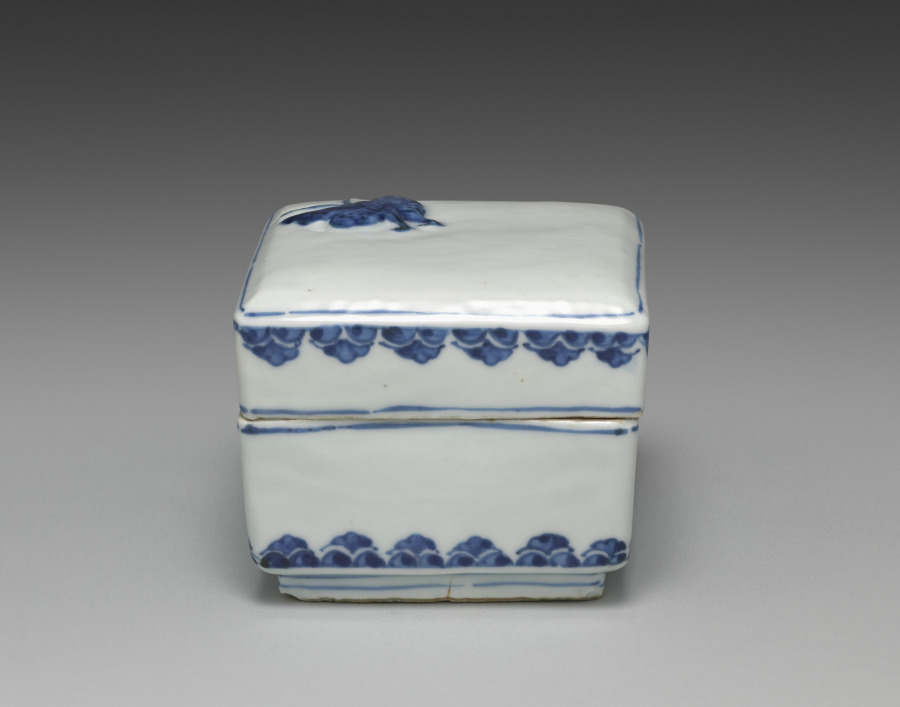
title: Box with Butterfly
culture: Japan, Meiji period (1868–1912)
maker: Seifū Yohei I (Japanese, 1801–1861)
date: 1855–57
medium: Porcelain with underglaze blue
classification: Ceramic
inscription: 清風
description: This sturdy box, with comparatively thick walls and resulting heft, is sparsely decorated with a single butterfly motif in dark underglaze blue cobalt in one corner of the lid and with repeating floral patterns along the lid and base. Single broken lines of underglaze blue define the edge of the box lid’s top where it curves to meet the sides and again where it meets the base of the box. Another blue band runs around the upper rim of the base where it meets the lip, left unglazed for a better grip of the lid when the box is closed. Yohei I’s signature on the center of the recessed base is set within a wide blue square. The porcelain box is meant to call to mind a famous story attributed to Zhuang Zhou (c. 369–286 BCE), also known as Master Zhuang, or Zhuangzi, pronounced Soji in Japanese. The second chapter of Zhuangzi, his eponymous collection of anecdotes, records the story as follows: Once, Zhuang Zhou dreamt he was a butterfly, a butterfly flitting and fluttering about, happy with himself and doing as he pleased. He didn’t know that he was Zhuang Zhou. Suddenly, he woke up and there he was, solid and unmistakable Zhuang Zhou. But he didn’t know if he was Zhuang Zhou who had dreamt he was a butterfly, or a butterfly dreaming that he was Zhuang Zhou. Between Zhuang Zhou and the butterfly there must be some distinction! This is called the Transformation of Things. The lidded box resembles kosometsuke, the porcelains in underglaze blue made to order or on speculation for the Japanese market during the early to mid-1600s in Jingdezhen, China. These works were often made from designs submitted by Japanese clients, many of whom were masters of chanoyu, who sought the wares for their tea practice. The relative roughness of the clay and the distortions in the fired object were intentional, as they created the rustic effect desired by Japanese tea communities.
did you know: It is possible that the model for this box was a smaller lidded box meant for storing incense.